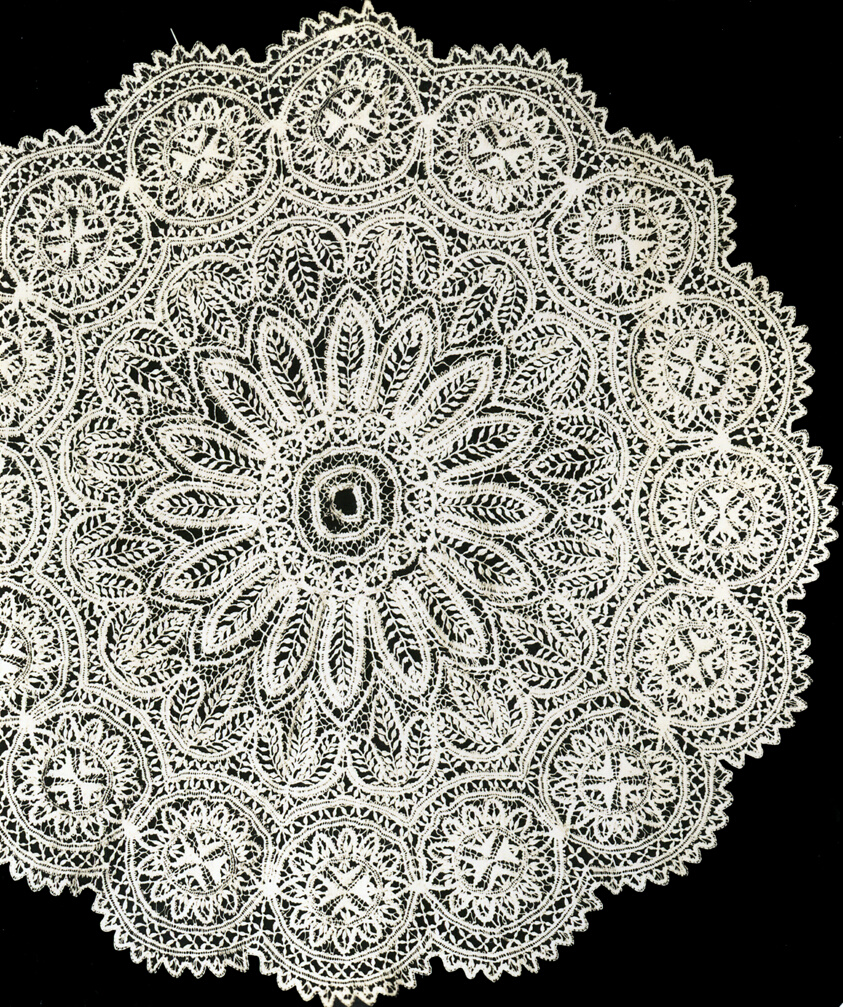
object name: Textile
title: Parasol Cover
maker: Malta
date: 1860s/80s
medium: Silk, bobbin straight lace (in bands)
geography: Malta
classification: textile; lace - bobbin; lace